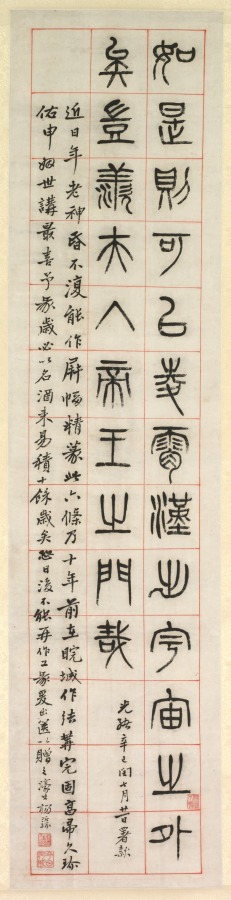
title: On Happiness, Calligraphy in Seal Script Style (zhuanshu)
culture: China, Changsu, Qing dynasty (1644-1911)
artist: Yang Yisun (Chinese, 1813–1881)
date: 1871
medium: hanging scroll, ink on paper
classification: Painting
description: Yang Yisun transcribed this ancient text on six narrow scrolls, starting at the top right and ending at the bottom left. Yang emphasizes the text’s historic nature by using the seal script style found on stone steles and bronze vessels. On Happiness features reflections of a scholar on a leisurely life in the countryside, composed by Han dynasty official Zhongchang Tong, who died the year the Han dynasty collapsed (AD 220). The idyllic life described in the text may bean evocation of the past in a time of national crisis. A decade before Yang wrote these scrolls, Anglo-French forces had looted and burned the Summer Palace in Beijing. At the same time, the domestic Taiping rebellion (1850–64), led by a religious fanatic to overthrow the Qing government, had devastated Yang’s homeland, the Jiangnan region, with an estimated 20 million lives lost.